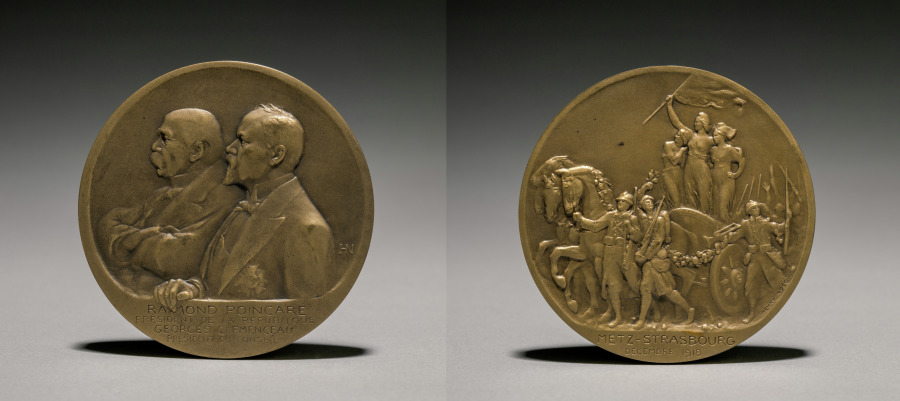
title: Poincare-Clemenceau Medal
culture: France, 20th century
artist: Henri Nocq (French, 1868–1942)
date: 1900s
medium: bronze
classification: Metalwork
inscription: obverse - "Raymond Poincare President de la Republique, Georges Clemenceau President du Conceil." reverse - "Metz - Strassbourg, Decembre 1918."